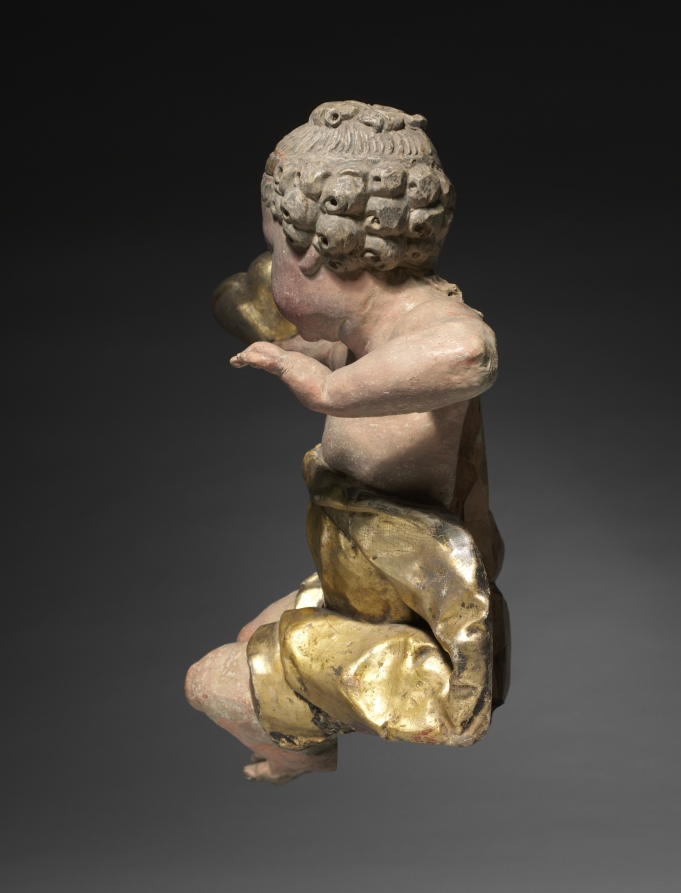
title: Putto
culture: Germany, near Bamberg, 18th century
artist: Ferdinand Tietz (Austrian, 1708–1777)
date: mid-1700s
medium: painted and gilded wood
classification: Sculpture